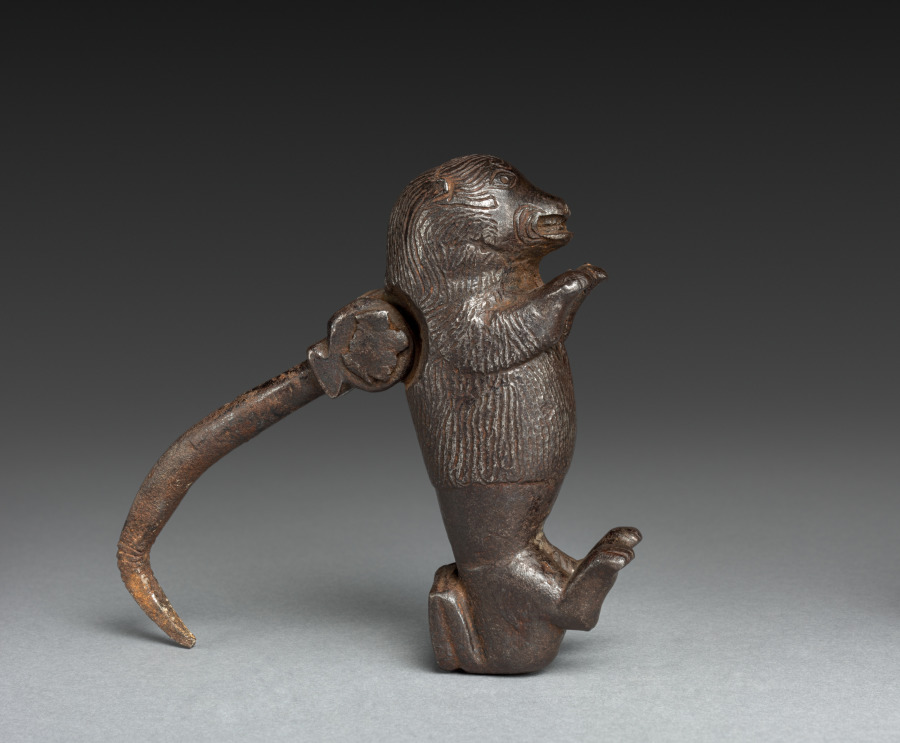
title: Doorknocker in the Form of a Lion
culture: Italy(?)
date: 1400s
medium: wrought iron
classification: Metalwork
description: Doorknockers such as this one were popular accessories for the homes of the wealthy during the Middle Ages. They are found in many different forms. The lion, symbolizing nobility, fortitude, and strength was highly favored.